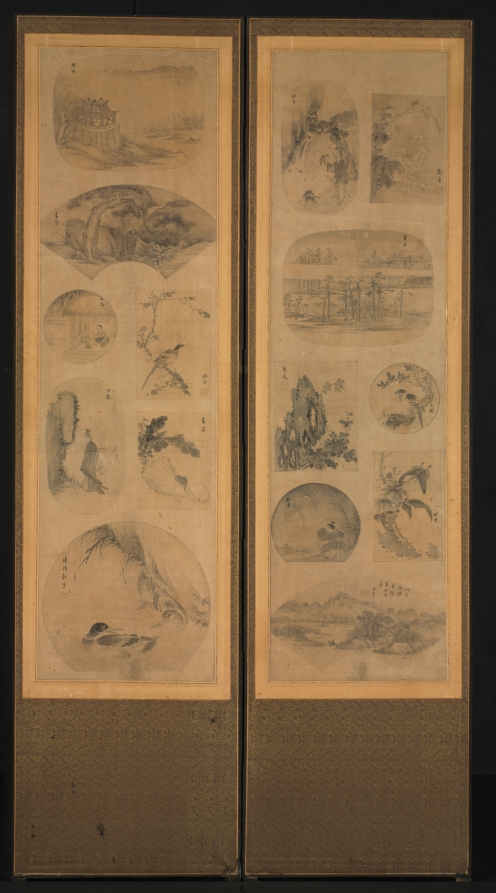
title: Painting of One Hundred Themes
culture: Korea, Joseon dynasty (1392–1910)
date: late 1800s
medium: Ten-panel folding screen affixed with album leaves (obverse), calligraphy (reverse), ink and color on silk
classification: Painting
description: The front of this screen features an assortment of subjects: birds and flowers, landscapes, and scenes of everyday life, mostly in monochromatic ink with light colors. The screen’s reverse side conveys a number of classical poems about the fleeting beauty of the four seasons. Traditionally, only one side of a folding screen bears painted or embroidered images, since these were used as a background furnishing. In Korean houses by the 1800s and early 1900s, however, two-sided folding screens became noticeably popular, possibly inspired by Japanese double-sided folding screens, which mainly served as room dividers in Japanese households.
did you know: The way of displaying small images of various subjects became one of the most popular type of painting toward the end of the 19th century.